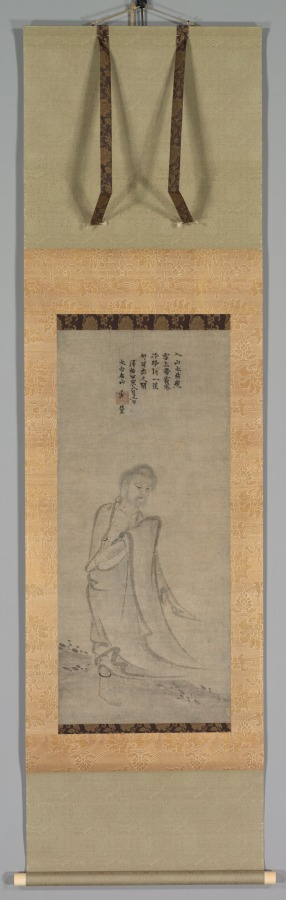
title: Shakyamuni Emerging from the Mountains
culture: China, Southern Song dynasty (1127-1279)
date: 1244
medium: hanging scroll; ink on paper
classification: Painting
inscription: 入山太枯瘦，雪上帶霜寒。 冷眼得一星，何再出人間。 淳祐甲辰八月二日 太白名山 道冲 贊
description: Shakyamuni emerged from the mountains after years of ascetic practices, which anticipated his sermon in Deer Park and attainment of enlightenment under the bodhi tree. However, this figure of Shakyamuni can be interpreted as having already achieved enlightenment and reentered the earthly world to spread the dharma (Buddhist law). Chijue Daoching’s inscription mentions his indifferent glance at the morning star, suggesting nonattachment: Entering the mountains he was much too thin and withered. The snow is overlaid with frost—it is cold. Casting an indifferent glance, he saw a [morning] star. Why should he once again emerge among the world of men.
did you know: The painting was inscribed by the abbot of Jingde Temple 景德寺 of Mount Tiantong 天童山 near Ningbo 寧波.